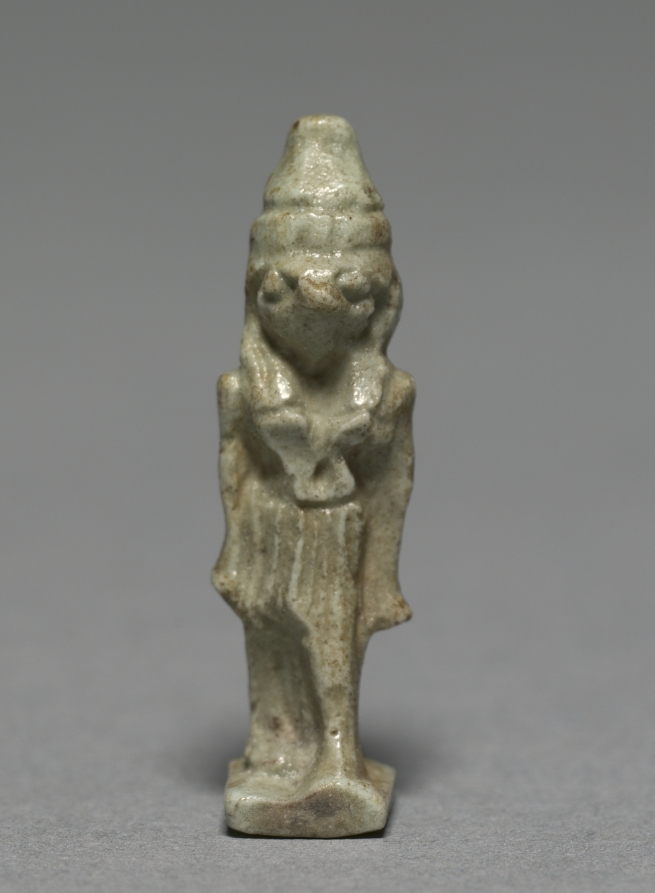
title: Amulet of Horus (?)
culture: Egypt, Late period (715–332 BCE), Dynasty 30–Greco-Roman period (332 BCE–395 CE), Ptolemaic dynasty (305–30 BCE)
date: 380–30 BCE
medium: gray green faience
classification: Amulets